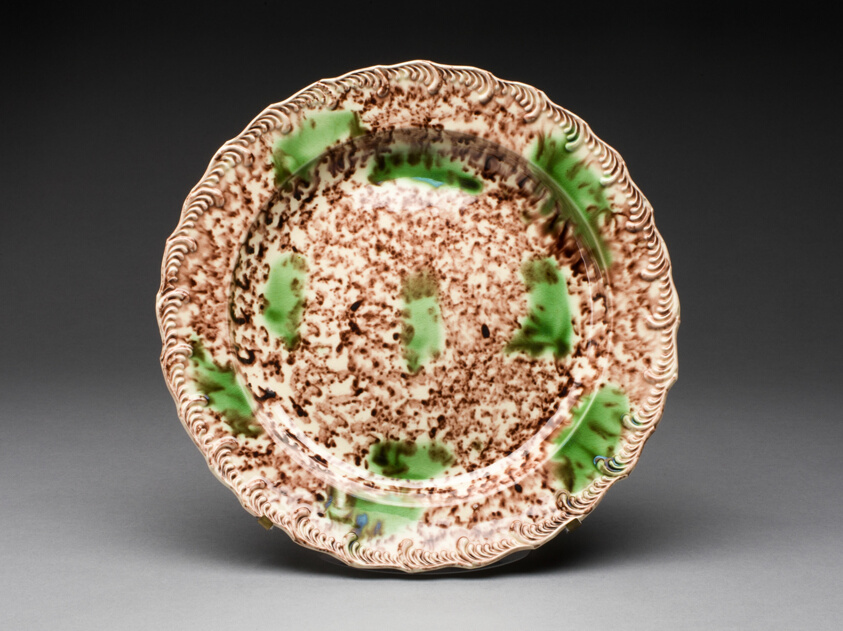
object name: Ceramics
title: Plate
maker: England, Staffordshire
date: 1760/70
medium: Lead-glazed earthenware (creamware)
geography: Staffordshire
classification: plate (general, dish); dish (vessel); ceramics; european decorative arts; creamware; earthenware; lead-glazed earthenware